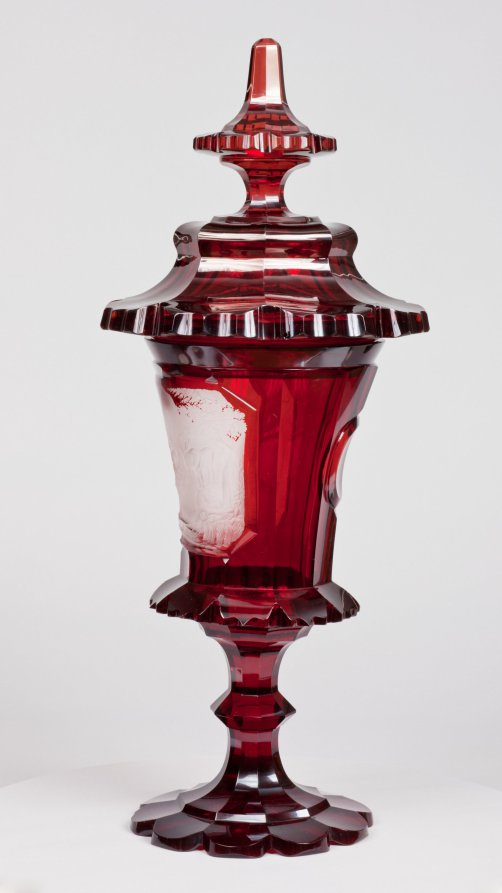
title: Covered Cup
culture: Bohemia, 19th century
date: mid-1800s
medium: ruby glass with engraved decoration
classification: Glass